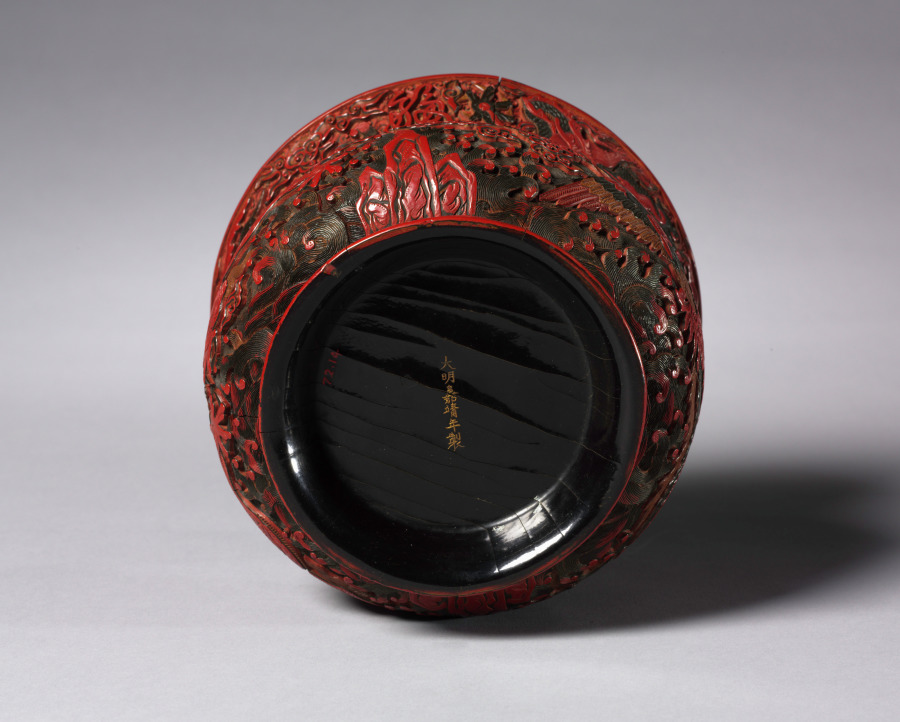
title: Jar with Dragon and Phoenix Design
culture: China, Jiangxi province, Jingdezhen, Ming dynasty (1368-1644), Jiajing mark and reign (1522-66)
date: 1522–66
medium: carved lacquer in cinnabar and other colors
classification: Lacquer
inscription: 大明嘉靖年製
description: A phoenix and dragon alternating with two auspicious ornate characters—“fortune” 福（fu) and “longevity” 壽 (shou)—adorn this exquisitely carved lacquer jar. Similar to contemporary five-color (wucai) decoration on porcelain, this jar shows layers of lacquer in black, ochre, green, and cinnabar (red). In a time-consuming process, a multitude of lacquer coatings were applied to the wooden core before its design could be carved into the surface. The phoenix and dragon are imperial emblems suggesting that this jar was made for the court. The base of the jar is inscribed: “Made in the Jiajing-era of the Great Ming [dynasty].”